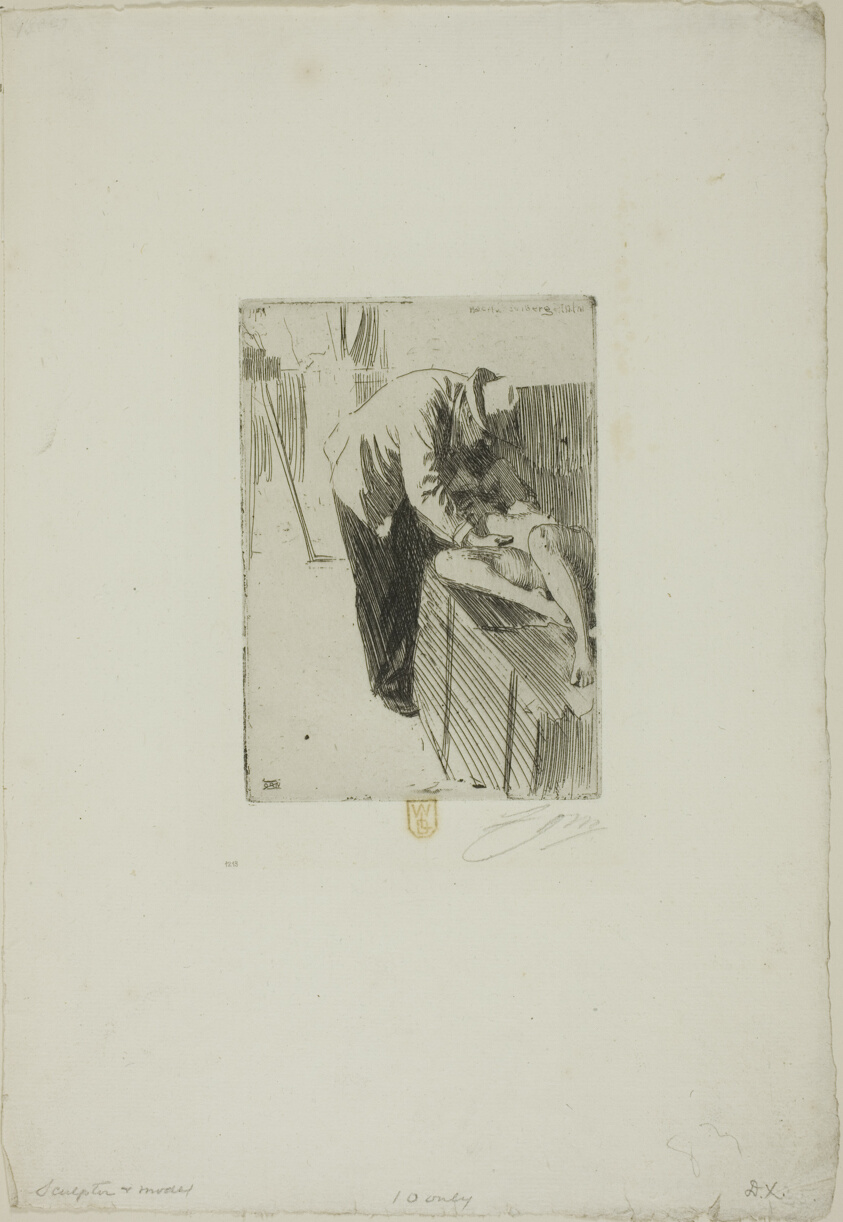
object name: Print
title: Per Hasselberg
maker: Anders Zorn (Swedish, 1860-1920)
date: 1891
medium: Etching on ivory laid paper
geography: Sweden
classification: etching; print; prints and drawing